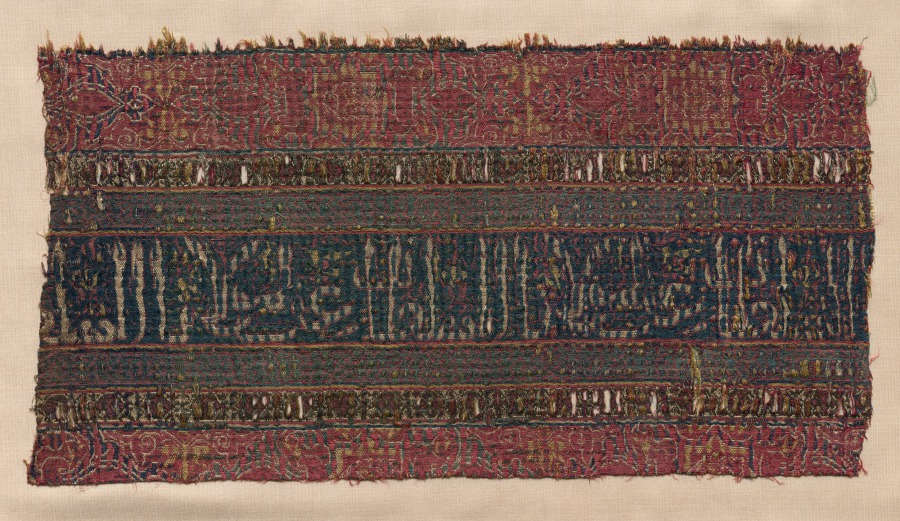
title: Silk Fragment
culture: Spain, Islamic period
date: 14th century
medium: lampas weave with areas of compound tabby, silk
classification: Textile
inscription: Reading from center outward: slate blue ground with Naskhi inscription ("Glory to our Lord, the Sultan") in white with red outlines.